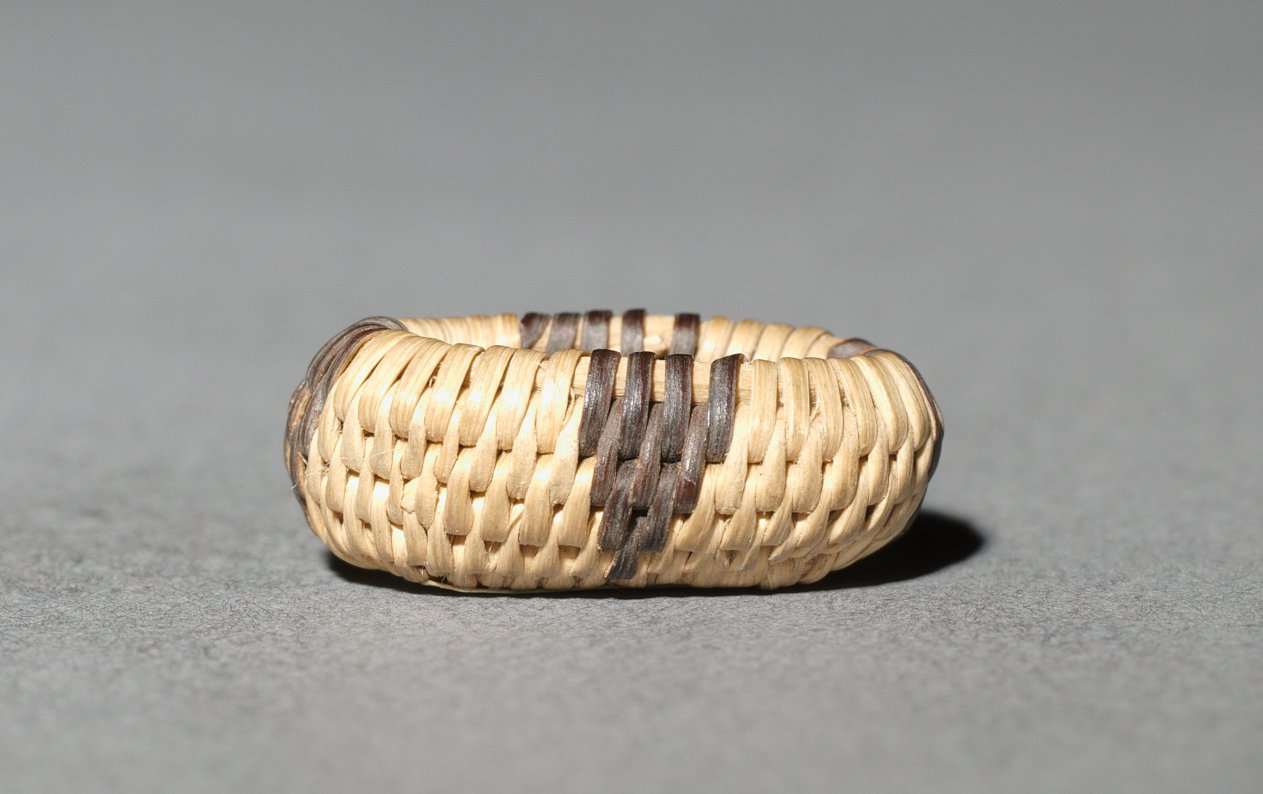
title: Miniature Basket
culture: America, Native North American, Southwest, Arizona, Akimel O'odham (Pima), Unassigned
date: before 1923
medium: plant fiber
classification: Basketry